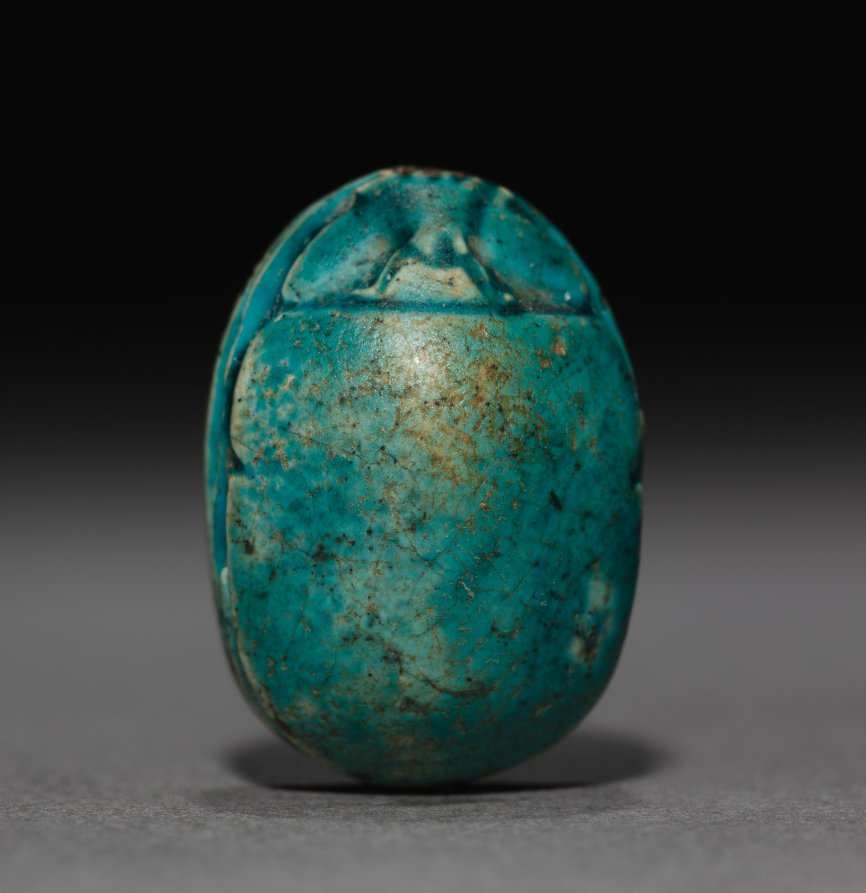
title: Scarab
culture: Egypt, Second Intermediate period (1648–1540 BCE)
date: 1648–1540 BCE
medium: turquoise-glazed steatite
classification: Scarabs